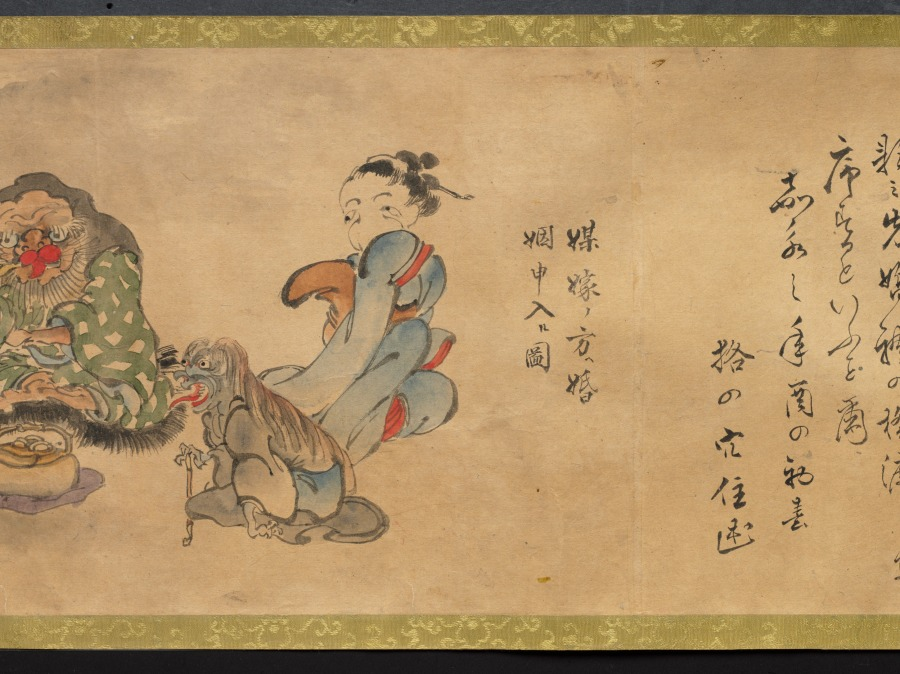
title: An Illustrated Marriage of Apparitions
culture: Japan, Edo period (1615–1868)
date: mid-1800s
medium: handscroll; ink and color on paper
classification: Painting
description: The matchmaking, engagement, wedding, and birth of the first child of two apparitions, or bakemono, literally "things that change," are illustrated in this whimsical, humorous handscroll. Japanese folklore abounds with such strange creatures, most famously represented in handscrolls featuring a procession of 100 supernatural monsters. Aside from a textual preface and cartouches indicating the content of the scenes, the tale is told visually. The artist and whereabouts of the original handscroll are unknown, but a number of other 19th-century copies by amateur painters exist in Japanese collections, attesting to its broad appeal.